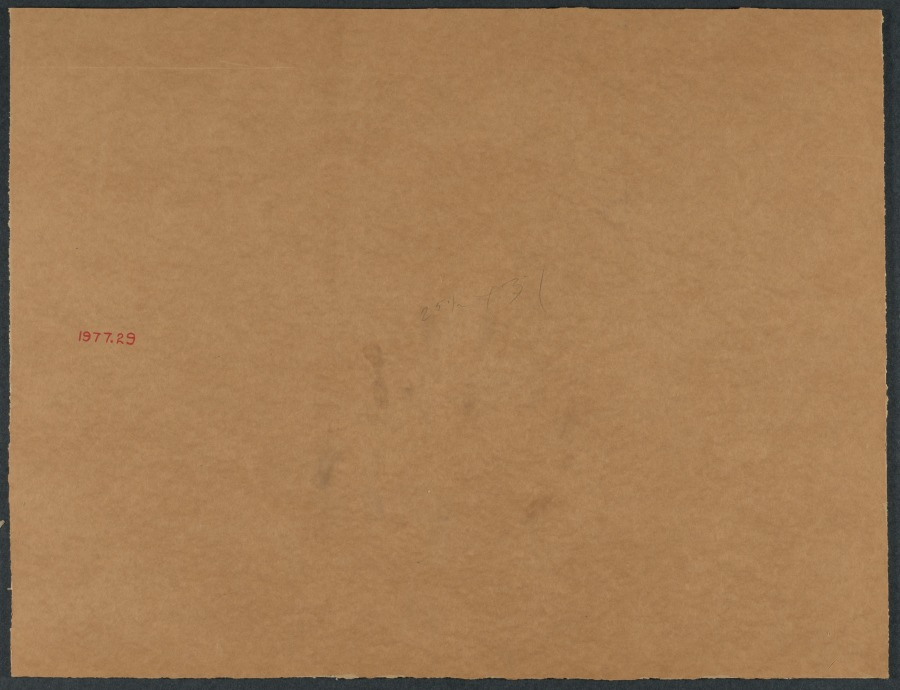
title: The Moon of San Gimignano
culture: America, Ohio, Cleveland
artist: John Lorin Black (American, 1894–1963)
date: 1929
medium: watercolor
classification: Drawing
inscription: Signed Lorin Black in lower right